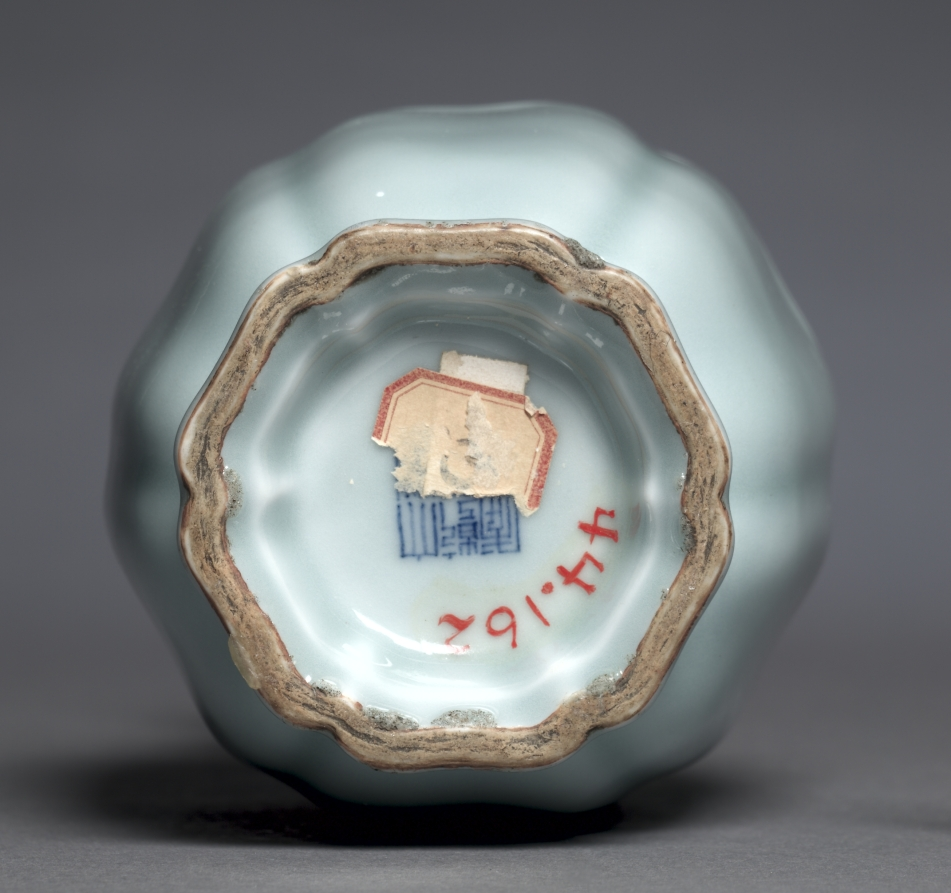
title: Vase with Dragon Handles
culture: China, Qing dynasty (1644–1911), Qianlong reign (1736–95)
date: 1736–95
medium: porcelain with celadon glaze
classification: Ceramic